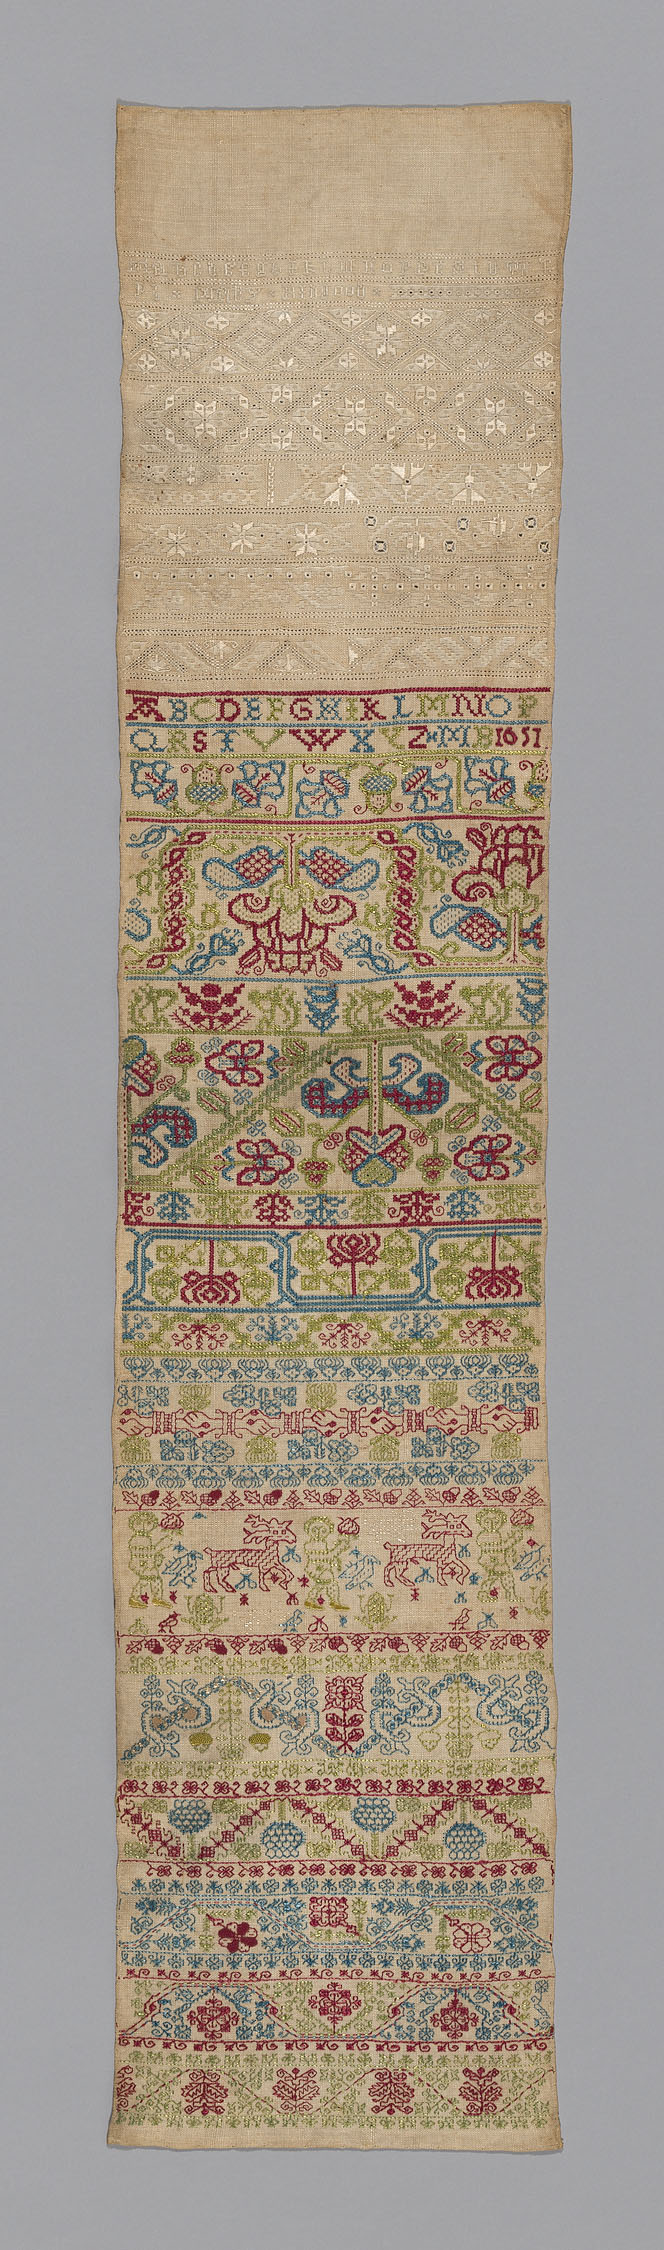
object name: Textile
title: Sampler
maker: Mary Bidgood (English, active mid-17th century); England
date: 1651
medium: Linen, plain weave; embroidered with silk and linen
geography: England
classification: sampler; needlework (visual works); textile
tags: alphabet